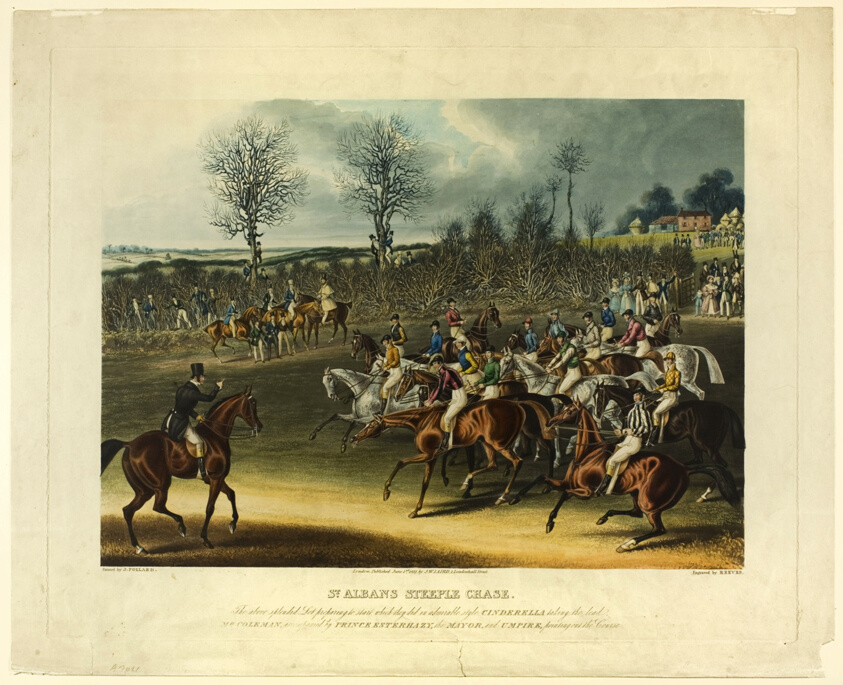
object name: Print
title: Saint Albans Steeplechase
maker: Reeves (probably English, 19th century); after James Pollard (English, 1797-1867)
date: 1837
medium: Aquatint on paper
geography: England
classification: aquatint; print; prints and drawing